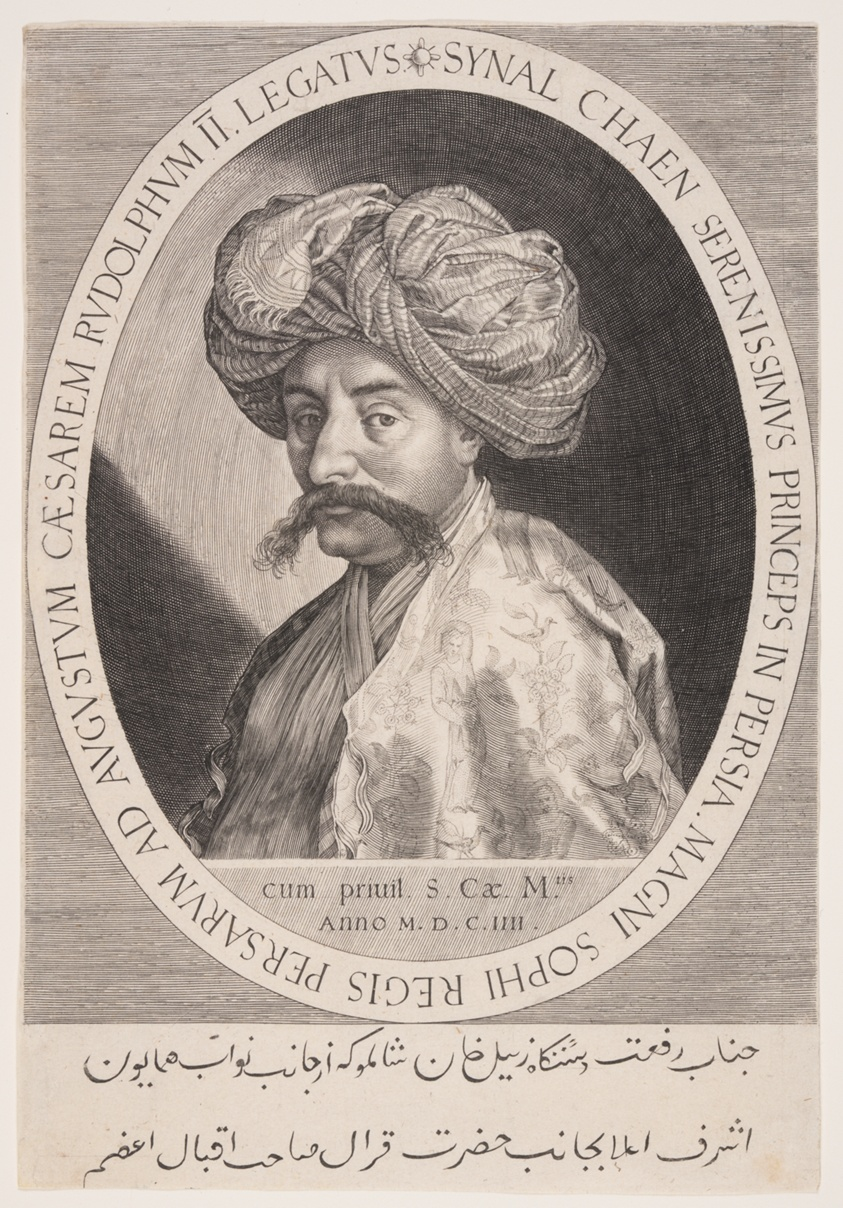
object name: Print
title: Synal Chaen (Zeynal Khan Shamlu), Persian Ambassador in Prague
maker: Aegidius Sadeler II; Flemish, c. 1570–1629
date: 1604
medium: Engraving on laid paper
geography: Flanders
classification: print; engraving; paper; prints and drawing